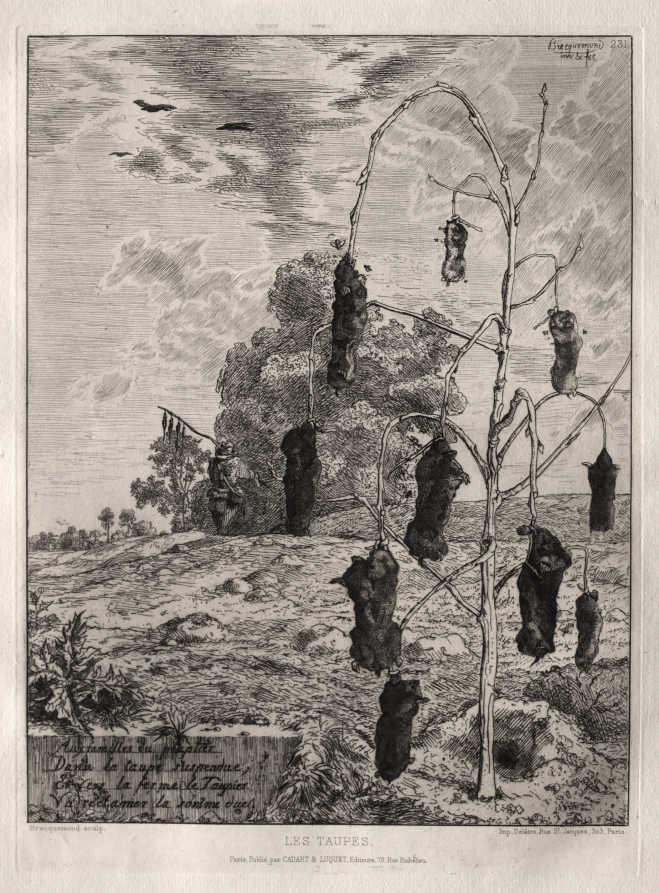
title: Moles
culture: France, 19th century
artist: Félix Bracquemond (French, 1833–1914)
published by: Cadart & Luquet, 79 , rue Richelieu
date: 1854, printed 1866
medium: etching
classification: Print